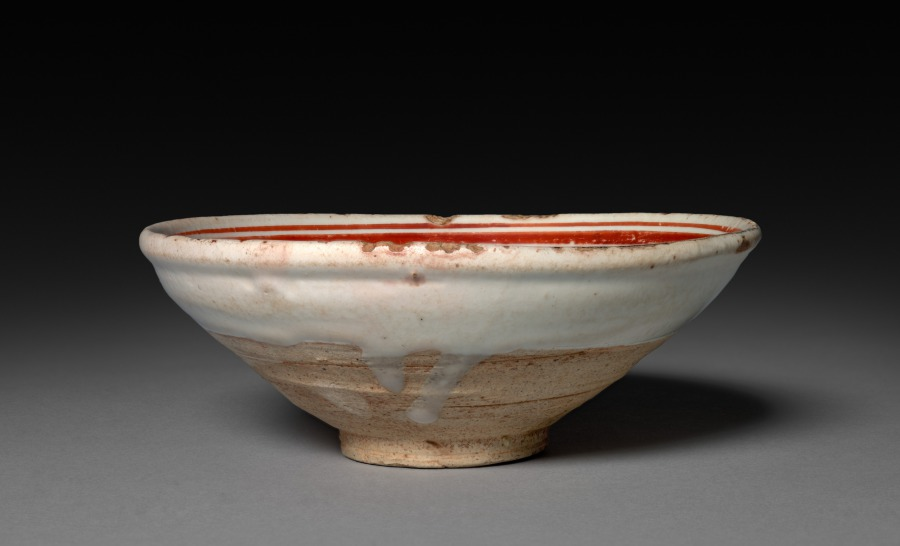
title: Cup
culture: China, Jin dynasty (1115-1234)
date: 1100s–1200s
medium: buff stoneware with underglaze slip application and overglaze enamel decoration, Cizhou ware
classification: Ceramic